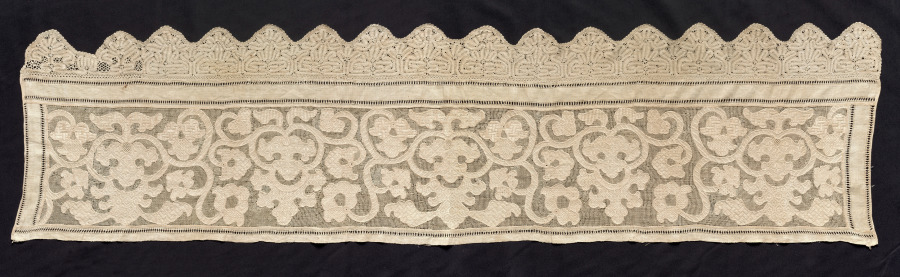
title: Runner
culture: Russia ?, 1800s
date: 1800s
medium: Linen: cutwork and drawnwork, straight (continuous) bobbin lace, (tape lace) edging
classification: Lace